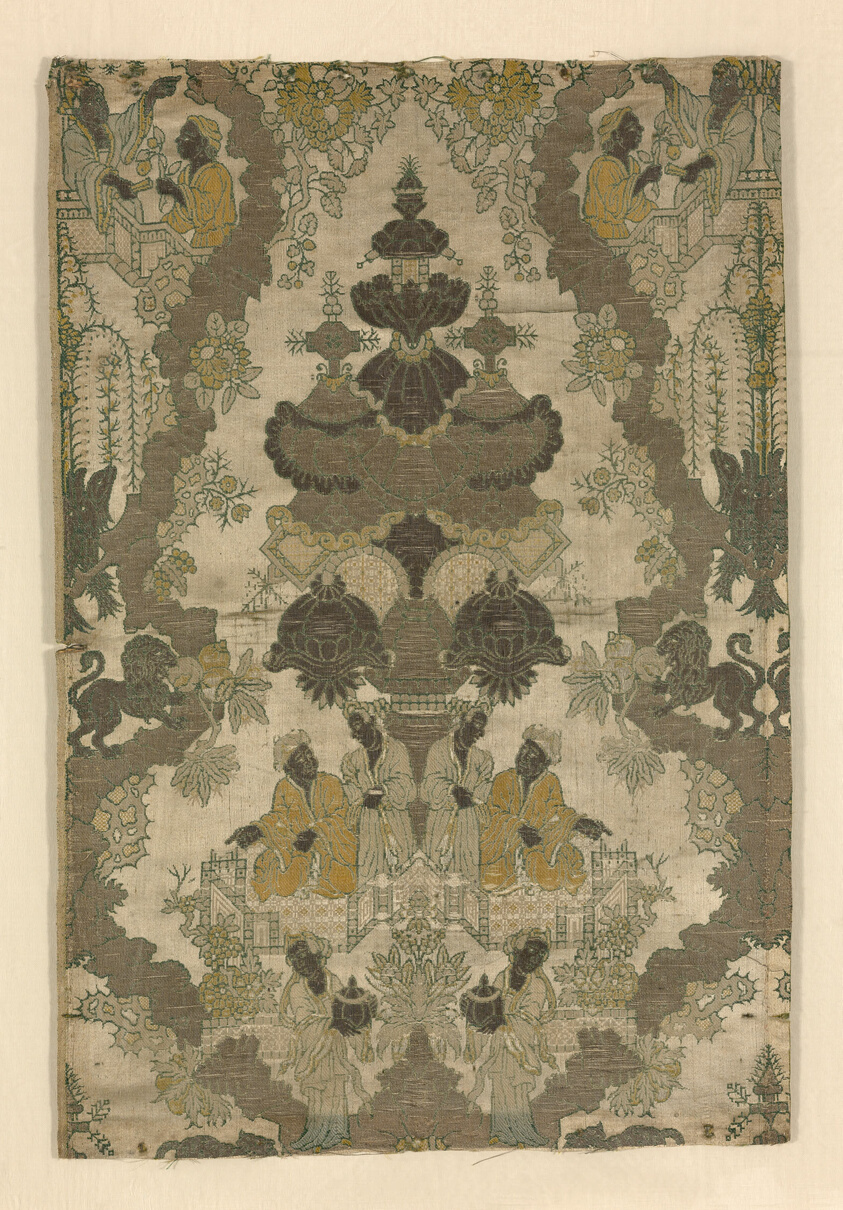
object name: Textile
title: Fragment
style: chinoiserie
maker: Probably France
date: c. 1708/09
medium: Silk, gilt-and-silvered-metal-strip-wrapped silk, warp-float faced 7:1 satin weave with supplementary brocading wefts and self-patterned by three-color complementary ground wefts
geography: France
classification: textile; weaving